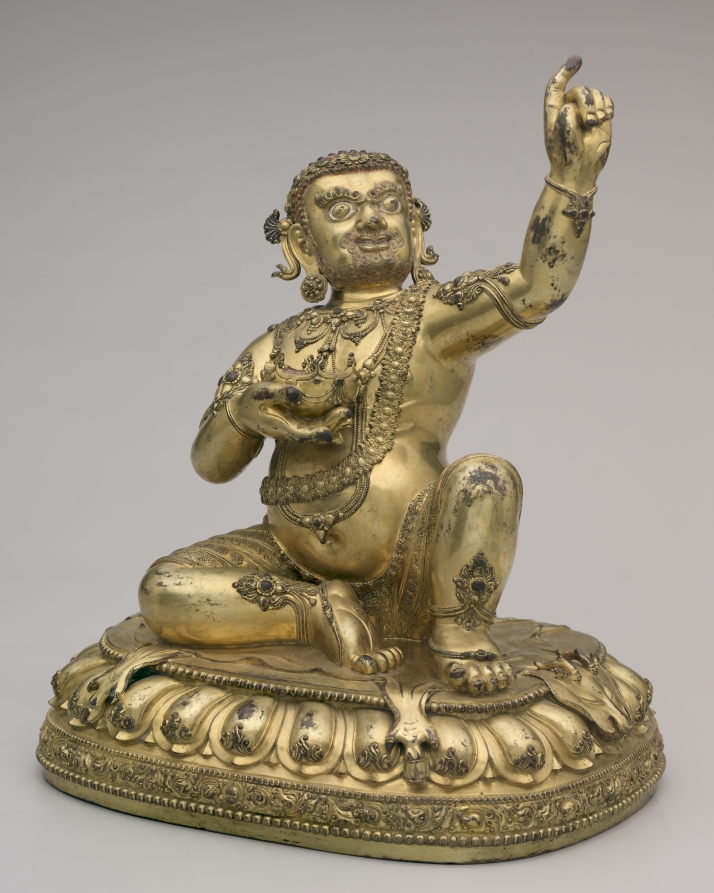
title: Virupa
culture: China, Ming dynasty (1368-1644), Yongle reign (1403-1424)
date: early 1400s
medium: Gilt bronze with silver, stones, and pigment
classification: Sculpture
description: Virupa is one of the great teachers in the history of tantric Buddhism. His posture references his ability to stop the sun; as an enlightened being, he can control phenomena of nature. As a tantric practitioner, he overturns ordinary assumptions about proper behavior, so he overeats, drinks large quantities of liquor, and waits for the king to pay his bill at the tavern. At the edge of the lotus pedestal is an inscription identifying the image as having been made in the imperial kilns of the third emperor of the Ming dynasty in China as a gift to a Tibetan monastic leader. While closely linked to Tibetan styles, the luxurious detailing, special gilding process, and the casting of the ornaments onto the body without use of inlay are specifically Chinese characteristics.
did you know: Virupa's clothing and jewelry are embellished with silver and stones, while pigments enhance his hair and eyes.